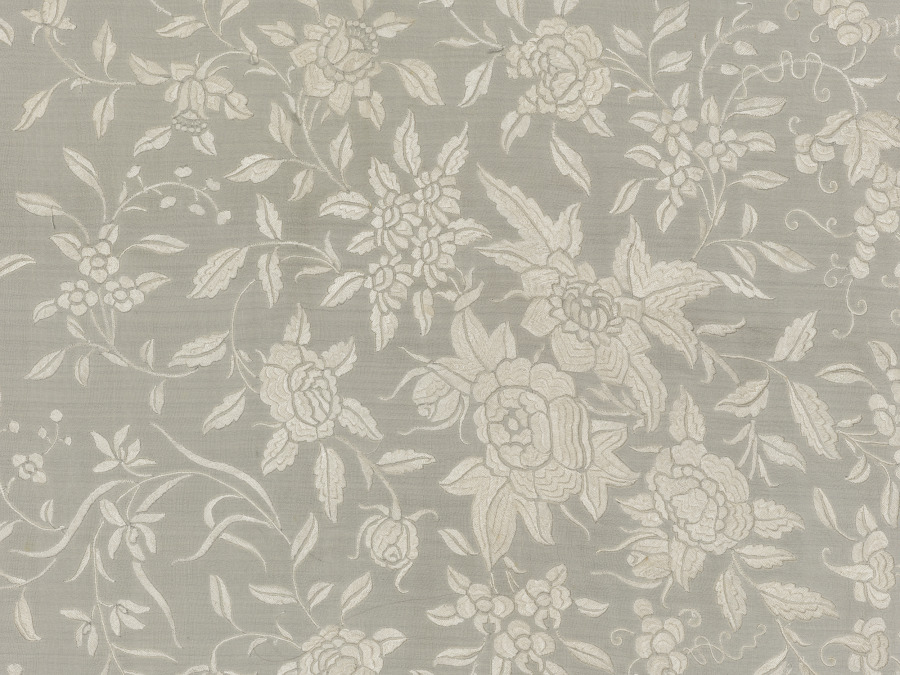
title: Silk Shawl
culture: China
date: 1800s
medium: embroidery, silk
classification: Embroidery